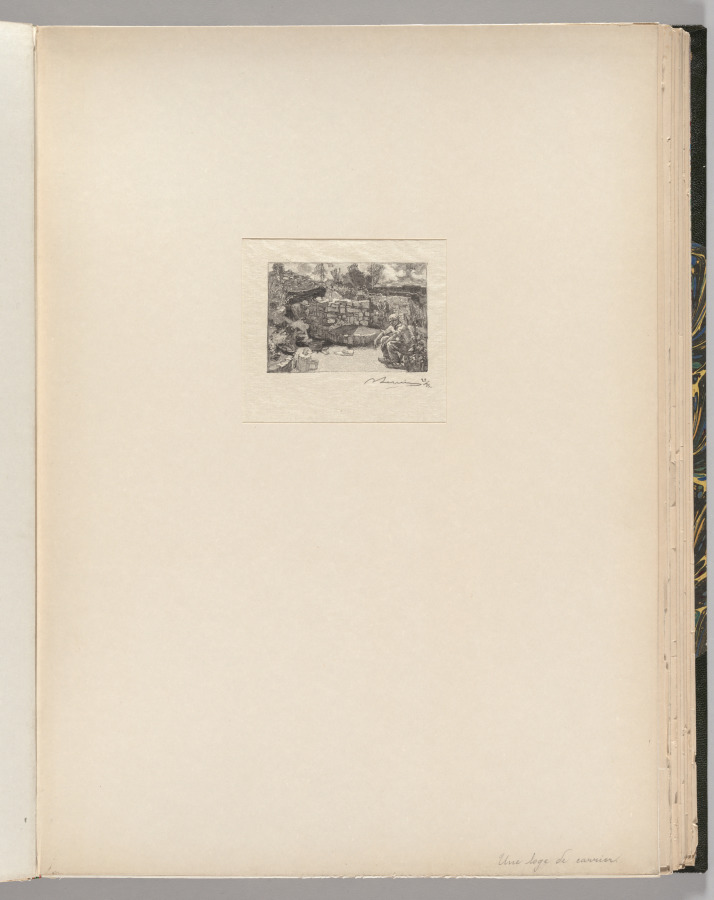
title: Fontainebleau Forest: Quarryman's Lodge (La Forêt de Fontainebleau: Une loge de carrier)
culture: France, 19th century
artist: Auguste Louis Lepère (French, 1849–1918)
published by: A. Desmoulins, Published in Revue Illustrée, 1887–90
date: 1890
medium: wood engraving from bound volume of 34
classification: Bound Volume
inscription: On block, upper right: A.L.; below image, lower right, in black ink: ALepère 22/35; on window mat, lower right, in graphite: Une loge de carrier